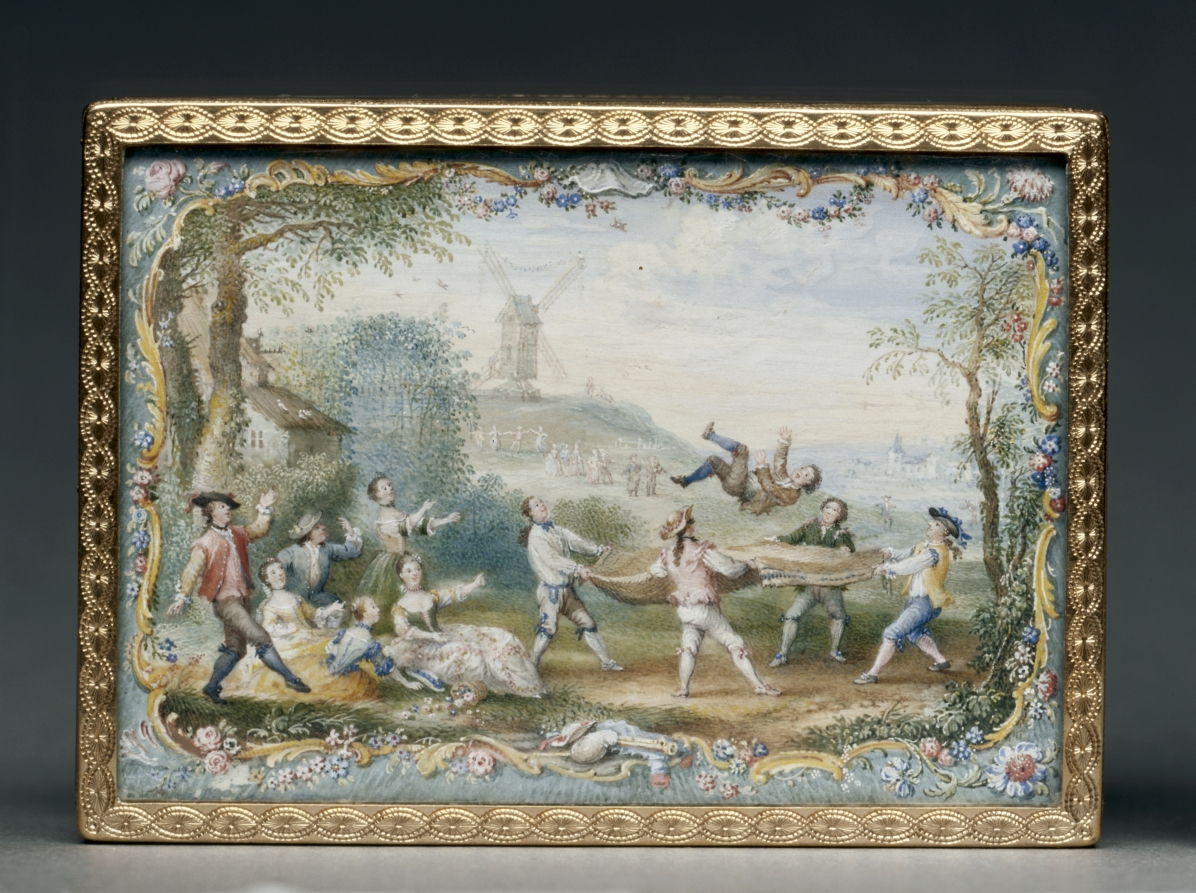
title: Snuff Box (Tabatière)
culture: France, 18th century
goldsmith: Jean Ducrollay (French, 1709–1787)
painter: Louis Nicolas van Blarenberghe (French, 1716–1794)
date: 1753–54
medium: gold and glass with miniatures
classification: Metalwork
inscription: [Maker's mark of Jean Ducrollay, master goldsmith in 1734, inside cover; bottom; right side]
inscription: [Charge mark of Julien Berthe, Paris, 1750-1756, inside cover; bottom; right side]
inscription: [Discharge mark of Julien Berthe, Paris, 1750-1756, on bezel]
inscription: [Inscribed on miniature, front side]: "V.[an] Blarenberghe/1753"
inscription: [Warden's mark for Paris, 1763-1754, inside cover; bottom; right side]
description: In 18th-century France ornately enameled boxes that held snuff—powdered tobacco—became a popular accessory in the French court. This object’s rectangular shape differs from early work attributed to Jean Ducrollay. Though the light colors, floral borders, and depictions of lively outdoor recreation are representative of earlier rococo imagery, the rectangular shape and simple frieze make it a primary example of rising neoclassicism.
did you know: The Ducrollay family was one of the most sought-after Parisian goldsmith workshops under the reign of French King Louis XV.